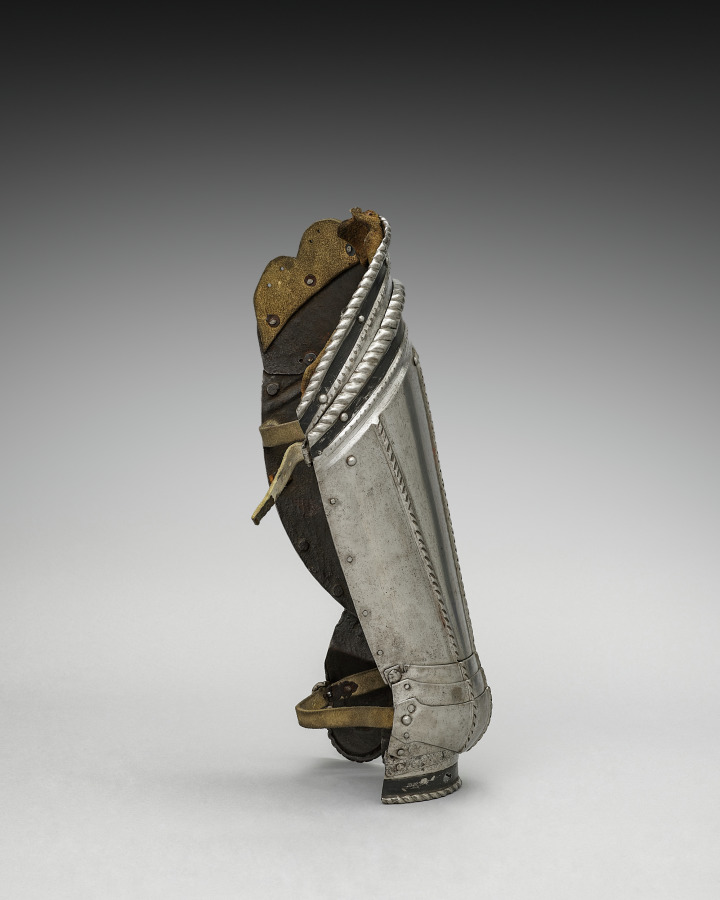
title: Left Cuisse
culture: Germany, 19th century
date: 1801–1900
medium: steel with black paint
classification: Arms and Armor